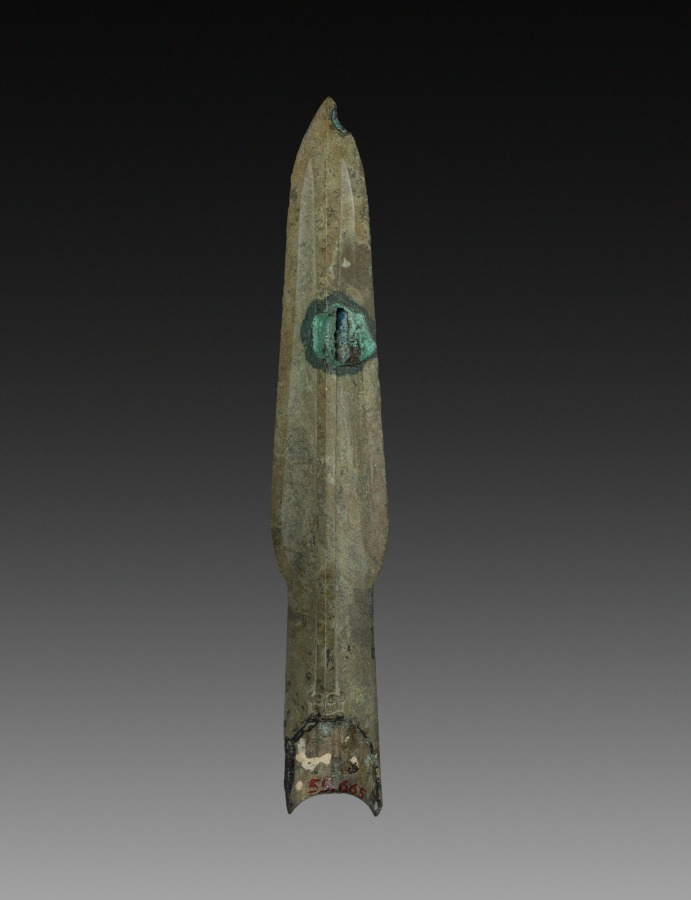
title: Spear Point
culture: China, Zhou dynasty (c. 1046–256 BCE)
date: 1045–256 BCE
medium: bronze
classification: Arms and Armor